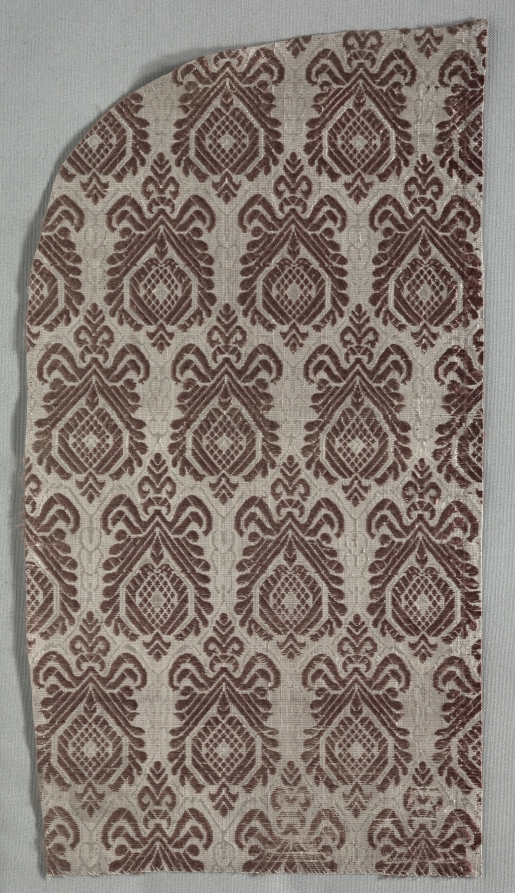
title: Textile Fragment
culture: Italy, 17th century (?)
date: 1600s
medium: fancy compound cloth; silk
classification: Textile